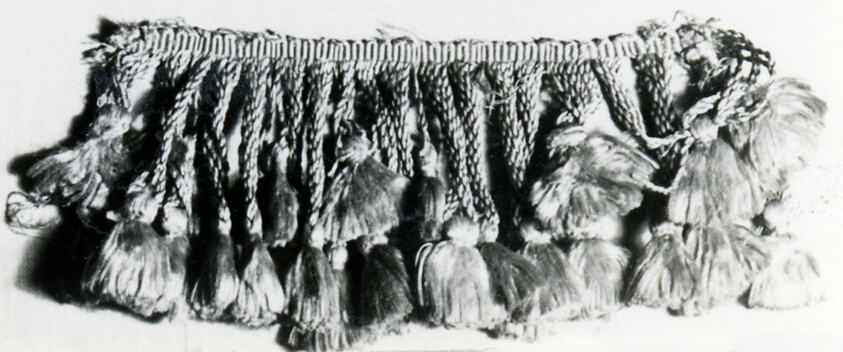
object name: Textile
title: Tassel Fringe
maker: Italy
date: 17th/18th century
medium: silk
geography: Italy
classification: textile; weaving